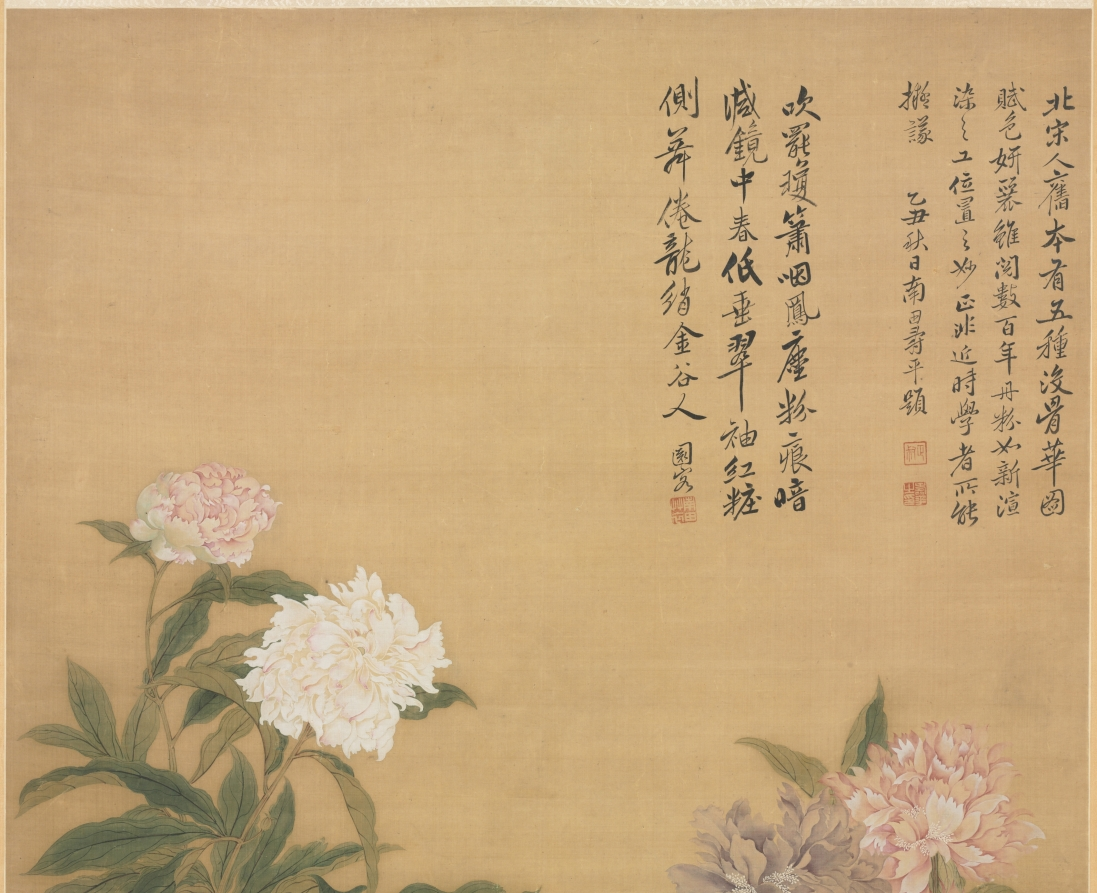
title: Herbaceous Peony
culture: China, Qing dynasty (1644-1911)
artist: Yun Shouping (Chinese, 1633–1690)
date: 1685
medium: Hanging scroll; ink and color on silk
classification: Painting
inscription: Artist's inscription, signature, and 3 seals: An old painting by an anonymous painter of the Northern Song Dynasty has five varieties of flowers painted in the boneless manner. Its colors are so beguiling and beautiful, that even after several hundred years its lead pigments are like new. The skill with which the ink and colors were applied and the subtlety of its composition find no equal among modern followers. On an autumn day in the yichou year [1685], Nantian, Shouping inscribed. [2 seals] Zhengshu; Shouping zhi yin.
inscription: Artist's poem (not translated). Signed Yuange. [seal] Nantian caoyi.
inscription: 3 additional seals of C. C. Wang 王季遷 (1907–2003).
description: Yun Shouping came from Piling (modern Changzhou), Jiangsu province, a center of floral, plant, and insect painting. He had joined the anti-Manchu resistance, was briefly imprisoned, and witnessed the death of family members in 1644. Like other artists, Yun Shouping expressed his Ming loyalism in coded pictures. The peony, king of flowers, and a spring garden motif developed new meaning during the Qing dynasty. The inscription indicates that Yun turns the flower into a motif representing the glorious past. The herbaceous peonies here appear somewhat withered and pale, with faint reddish veins running through its broken branches, perhaps a coded message. The inscription reads, An old painting by an anonymous painter of the Northern Song Dynasty has five varieties of flowers painted in the boneless manner. Its colors are so beguiling and beautiful, that even after several hundred years its lead pigments are like new. The skill with which the ink and colors were applied and the subtlety of its composition find no equal among modern followers.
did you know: In East Asian art, peonies traditionally symbolize prosperity and wealth.